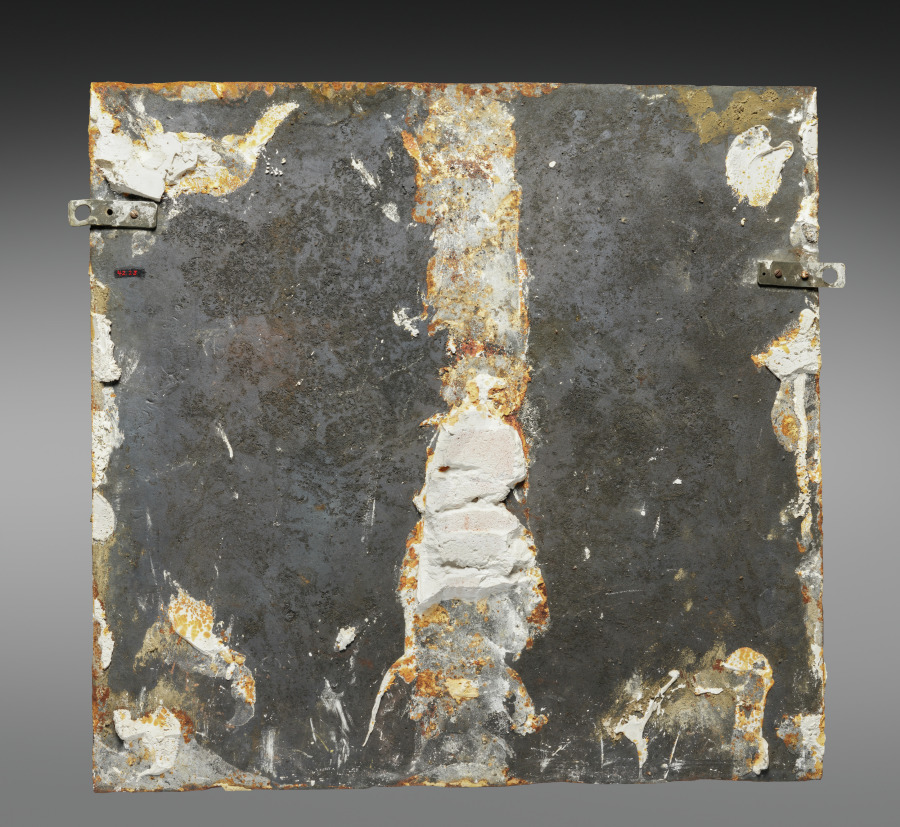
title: Set of Fire Linings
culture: France, style of Louis XVI, 18th Century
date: c. 1770–1780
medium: cast iron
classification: Furniture and woodwork